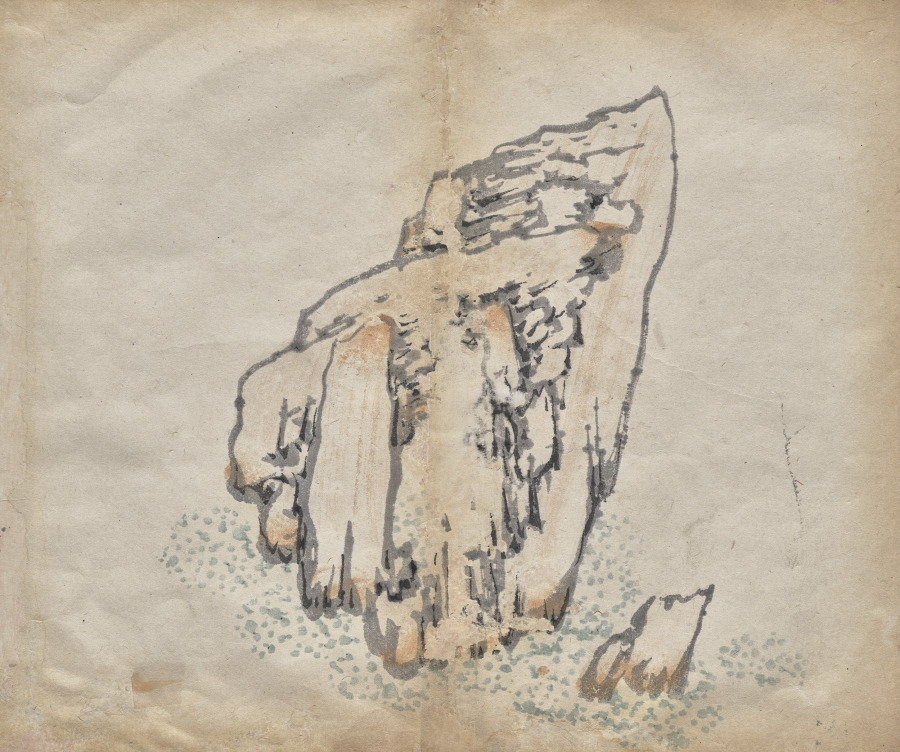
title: Untitled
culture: China, Ming dynasty (1368–1644)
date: 1625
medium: color woodblock print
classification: Print